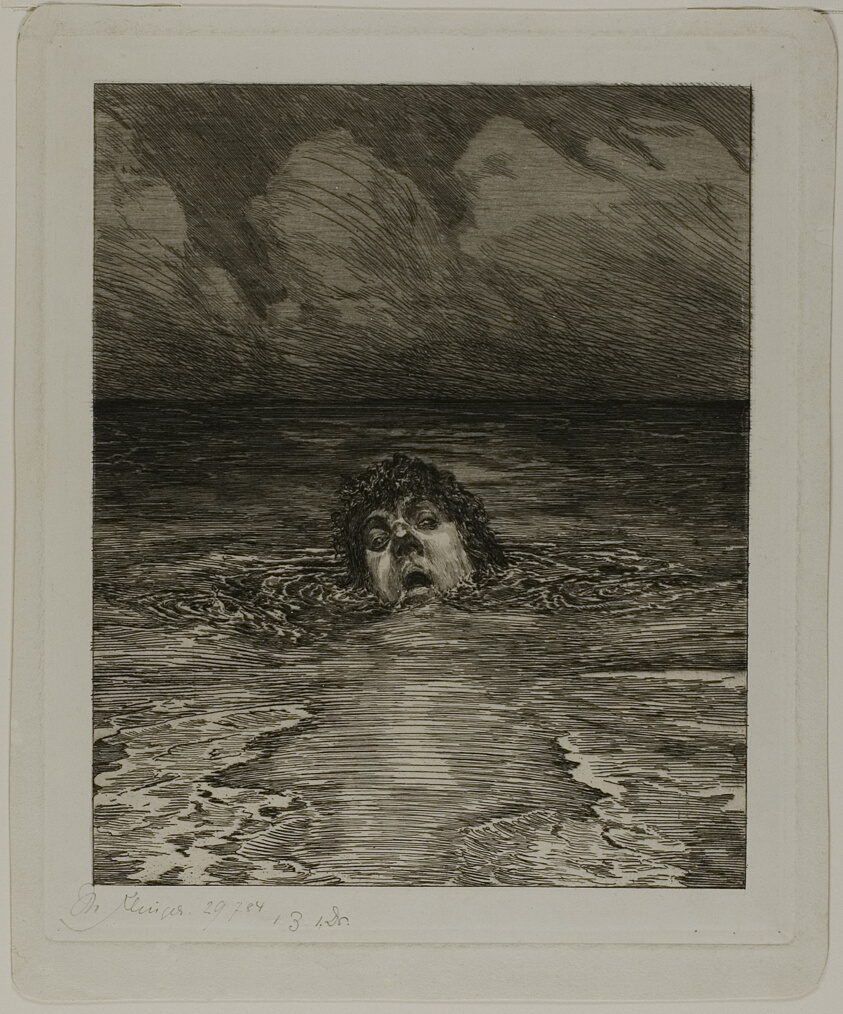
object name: Print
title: Downfall, plate twelve from A Life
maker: Max Klinger (German, 1857-1920)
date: 1884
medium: Etching and drypoint on ivory wove paper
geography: Germany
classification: etching; print; prints and drawing